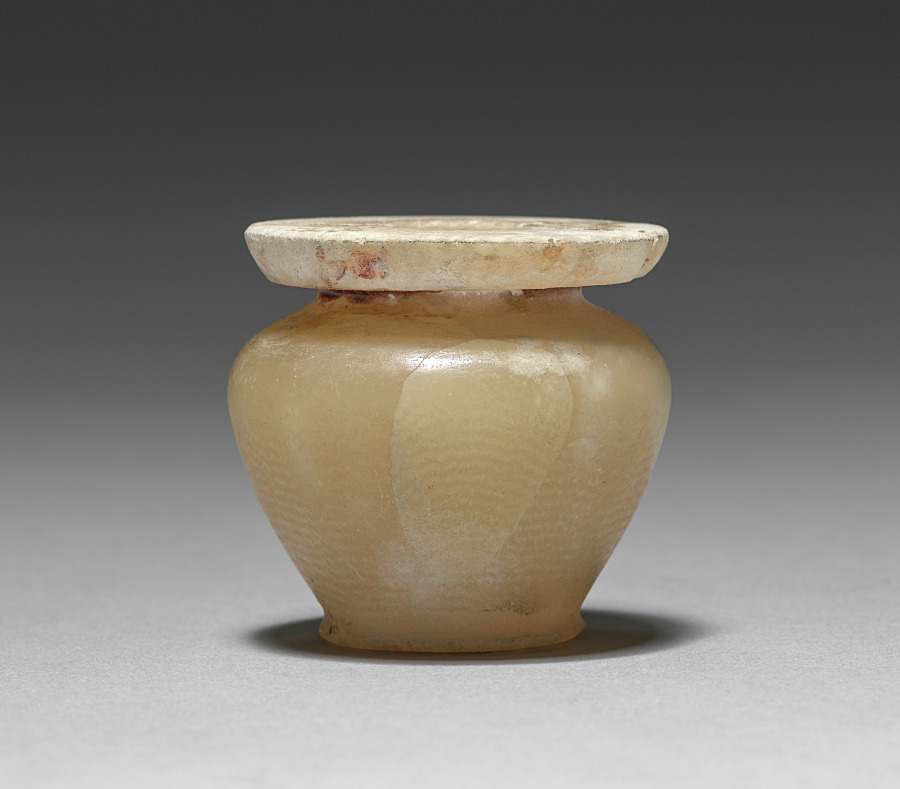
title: Kohl Jar with Lid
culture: Egypt, Middle Kingdom (2040–1648 BCE), Dynasty 12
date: 1980–1801 BCE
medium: travertine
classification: Vessels